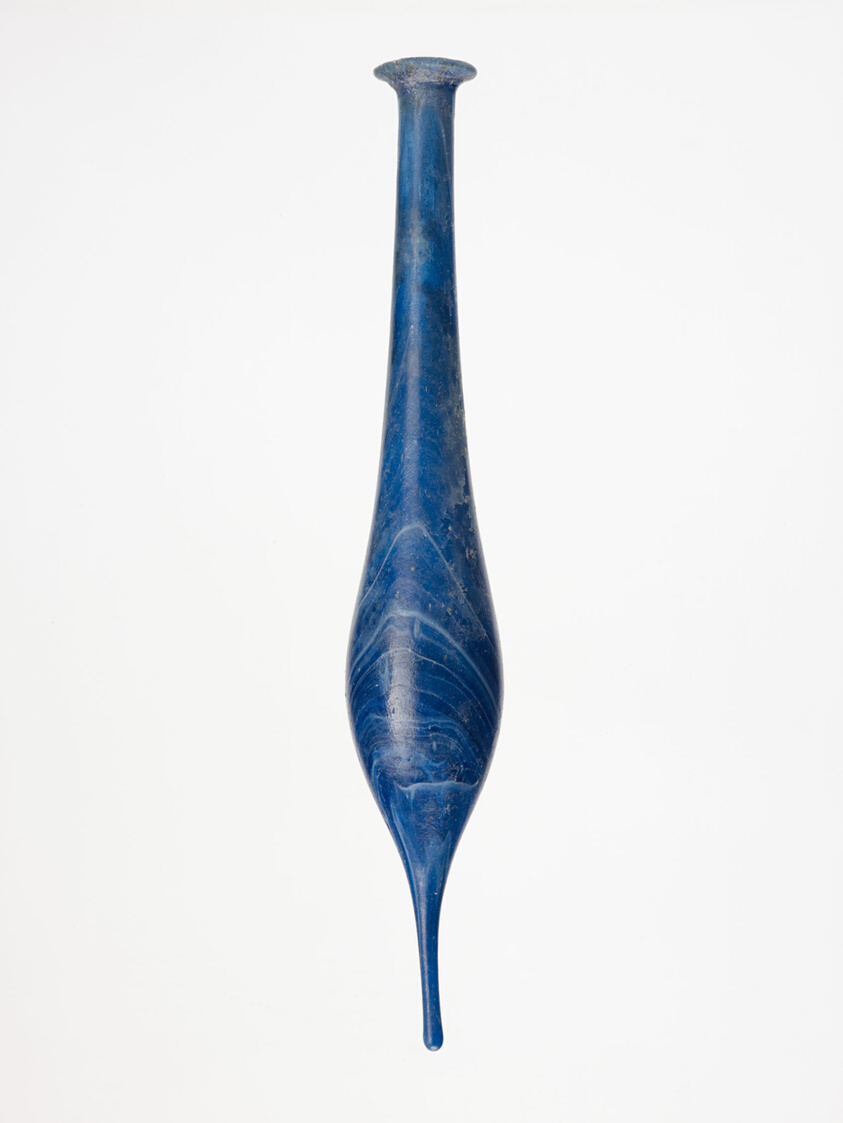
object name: Vessel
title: Alabastron (Container for Scented Oil)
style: roman (ancient, style or period), ancient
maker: Roman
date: 1st century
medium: Glass, blown technique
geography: Roman Empire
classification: container; alabastron; glass; vessel; ancient art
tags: beauty, rituals